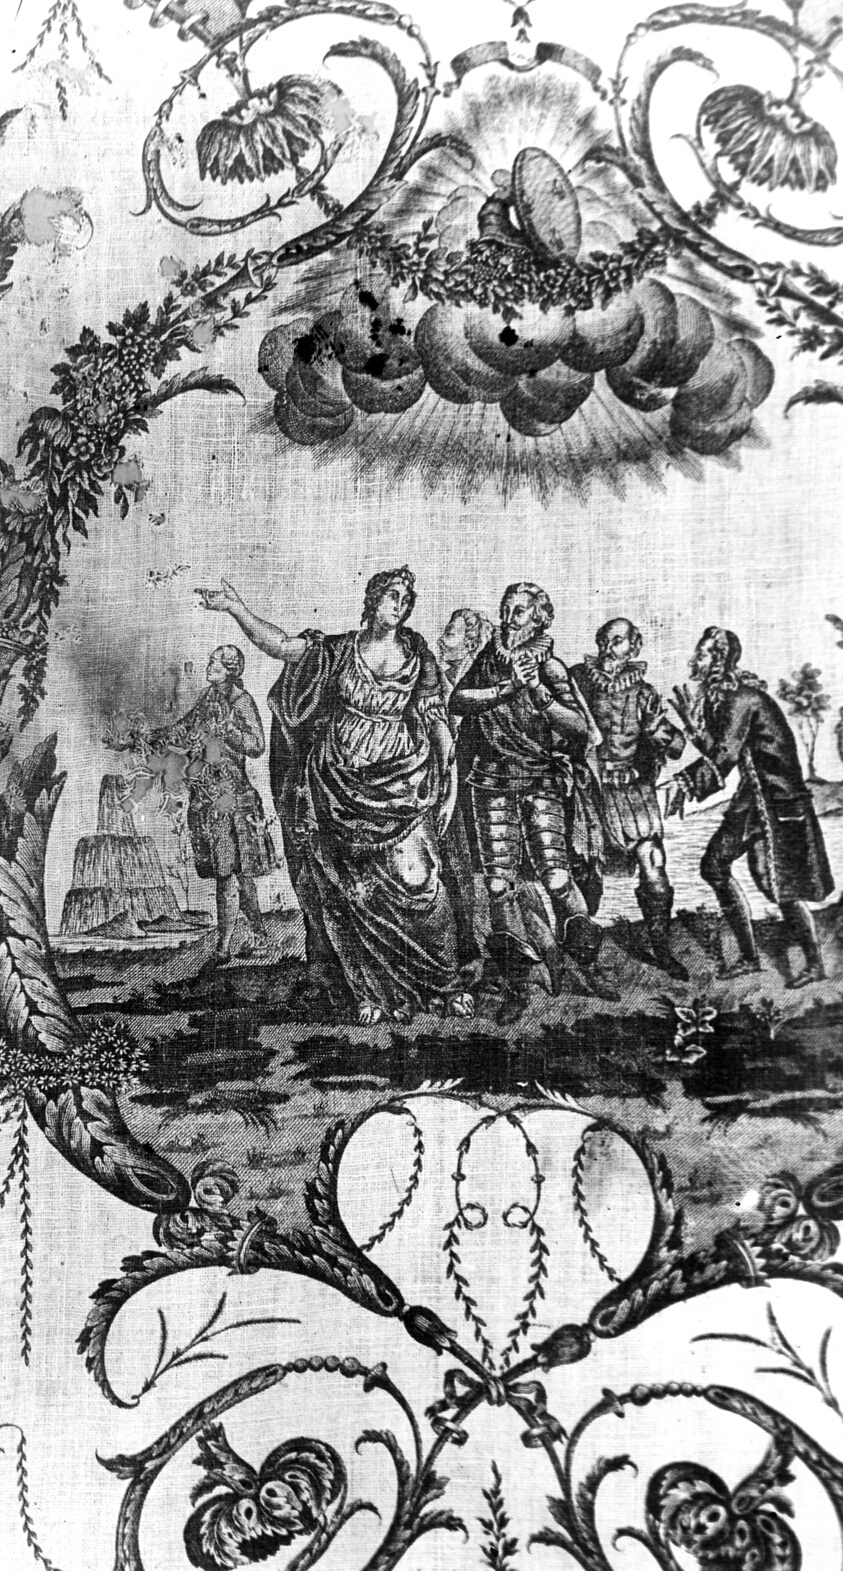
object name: Textile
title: Triomphe de Voltaire (Triumph of Voltaire) (Furnishing Fabric)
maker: Manufactured by Petitpierre et Cie. (French, c. 1760-1791); France, Nantes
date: c. 1788/93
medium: Cotton, plain weave; copperplate printed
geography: Nantes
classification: textile; weaving - printed; furnishing textile